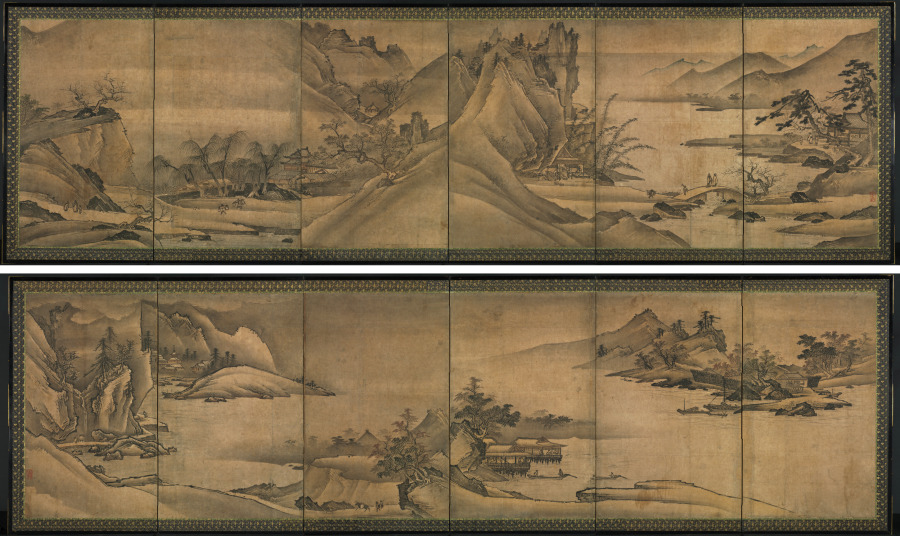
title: Landscape of the Four Seasons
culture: Korea, Joseon dynasty (1392–1910)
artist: Yi Sumun (Korean, b. c. 1404)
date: late 1400s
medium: Pair of six-panel screens; ink and slight color on paper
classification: Painting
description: Yi Sumun is believed to have been a Korean painter who migrated to Japan in 1424 at the age of 20. This pair of screens is the artist’s most important composition in this format. Viewed from right to left, the screens show the passage of the four seasons, a popular theme in medieval Japanese ink painting.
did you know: Yi Sumun is believed to have been a Korean man who moved to Japan in 1424 and became an influential landscape painter in Japan.